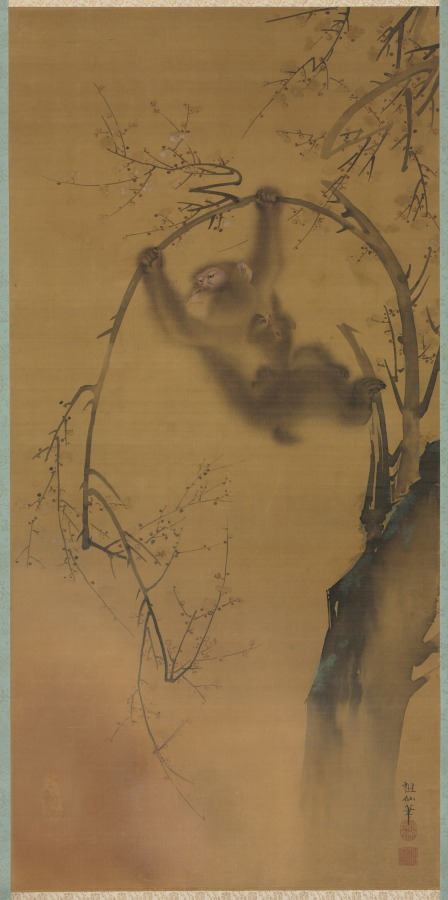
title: Monkeys in a Cherry Tree; Monkeys on a Rock Ledge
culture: Japan, Edo period (1615–1868)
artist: Mori Sosen (Japanese, 1747–1821)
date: c. 1800–1821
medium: hanging scroll, mounted and framed, ink and color on silk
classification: Painting